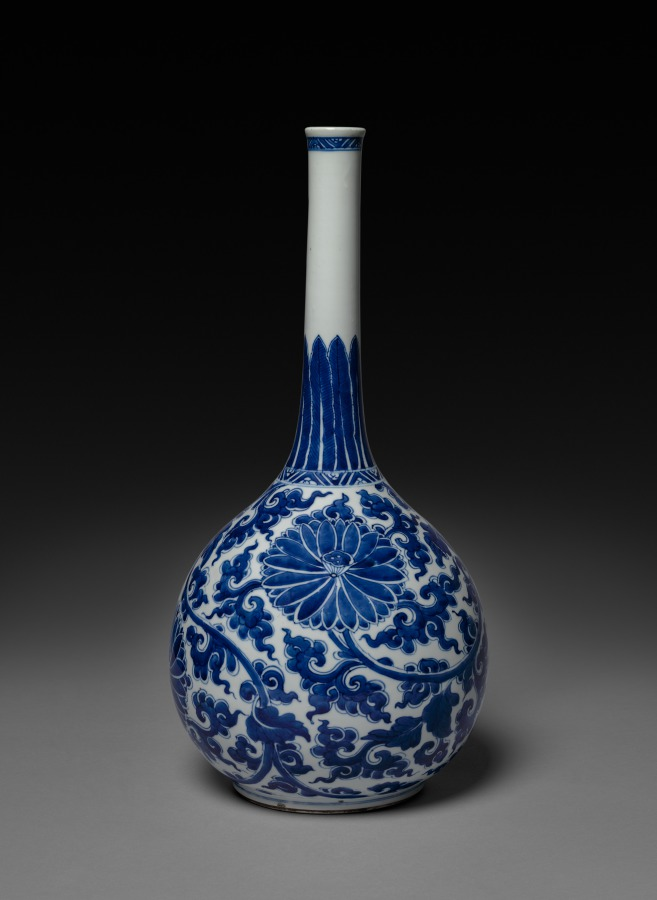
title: Bottle-shaped Vase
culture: China, Qing dynasty (1644-1911), Kangxi reign (1662-1722)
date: 1662–1722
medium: porcelain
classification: Ceramic